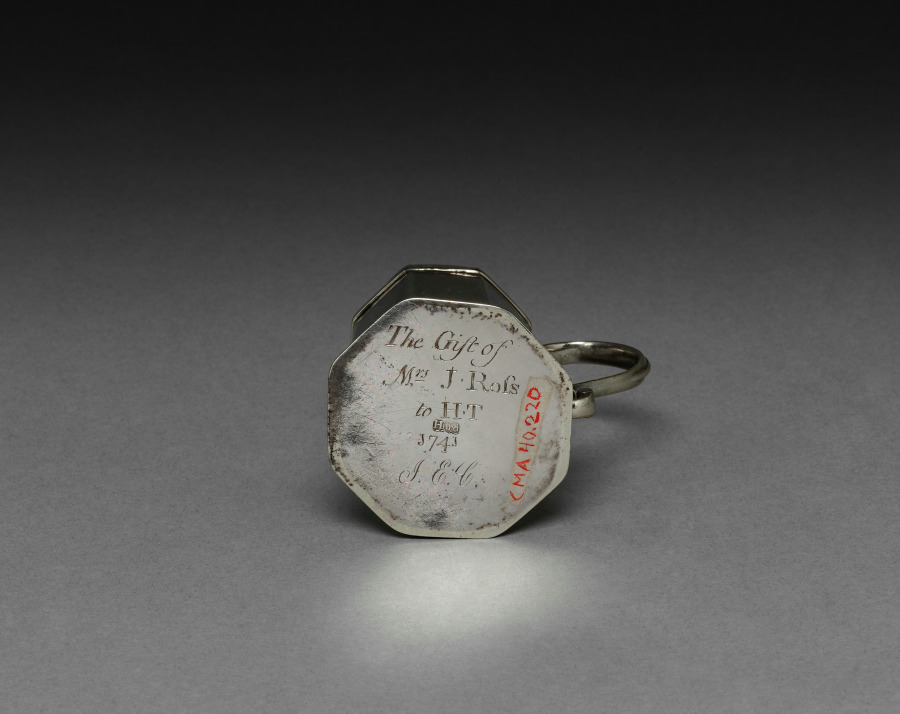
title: Caster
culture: America, Massachusetts, Boston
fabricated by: Jacob Hurd (American, 1702–1758)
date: 1743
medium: silver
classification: Silver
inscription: engraved: "The Gift of /Mrs J. Ross/to H.T/1743" and "J.E.C." (later, in script) on bottom. Small star near scam of cover band.